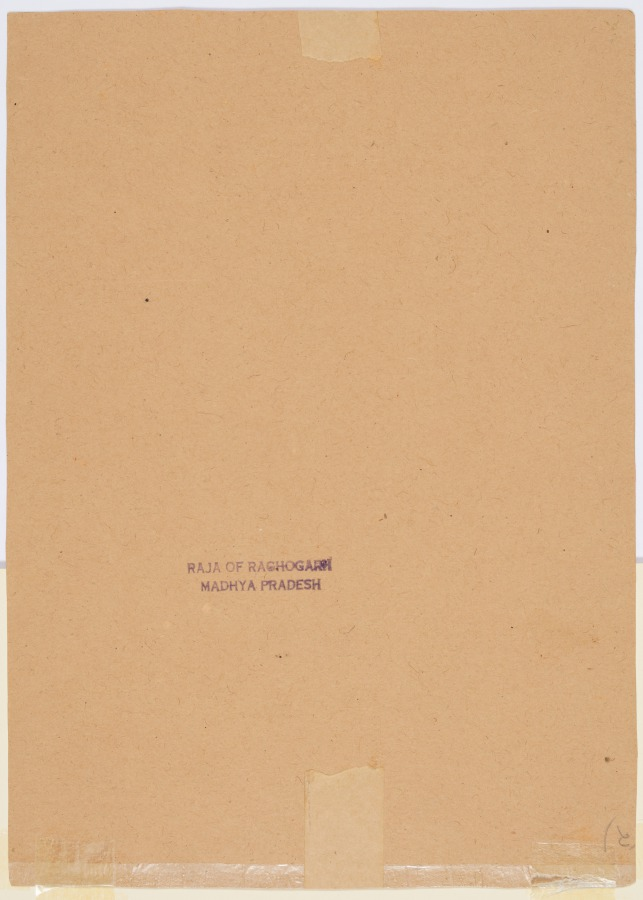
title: A Disconsolate Lady on a Terrace with Attendants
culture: Northwestern India, Rajasthan, Rajput Kingdom of Raghogarh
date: c. 1730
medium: Gum tempera, silver, and gold on paper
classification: Painting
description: This princess is waiting for her lover to arrive. Thinking of him, she touches her breast and her lap, while one attendant keeps flies off with the royal whisk, and the other bites her finger in a gesture of astonishment. The artist has whimsically manipulated elements of the landscape, such as the blazing sun peeking out from behind the flat black hill at the lower left corner, and invading the yellow strip at the top with blocks of blue sky to accommodate the finials of the palace rooftops.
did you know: Her loose hair and seating posture with one leg outstretched indicate that she is losing hope.